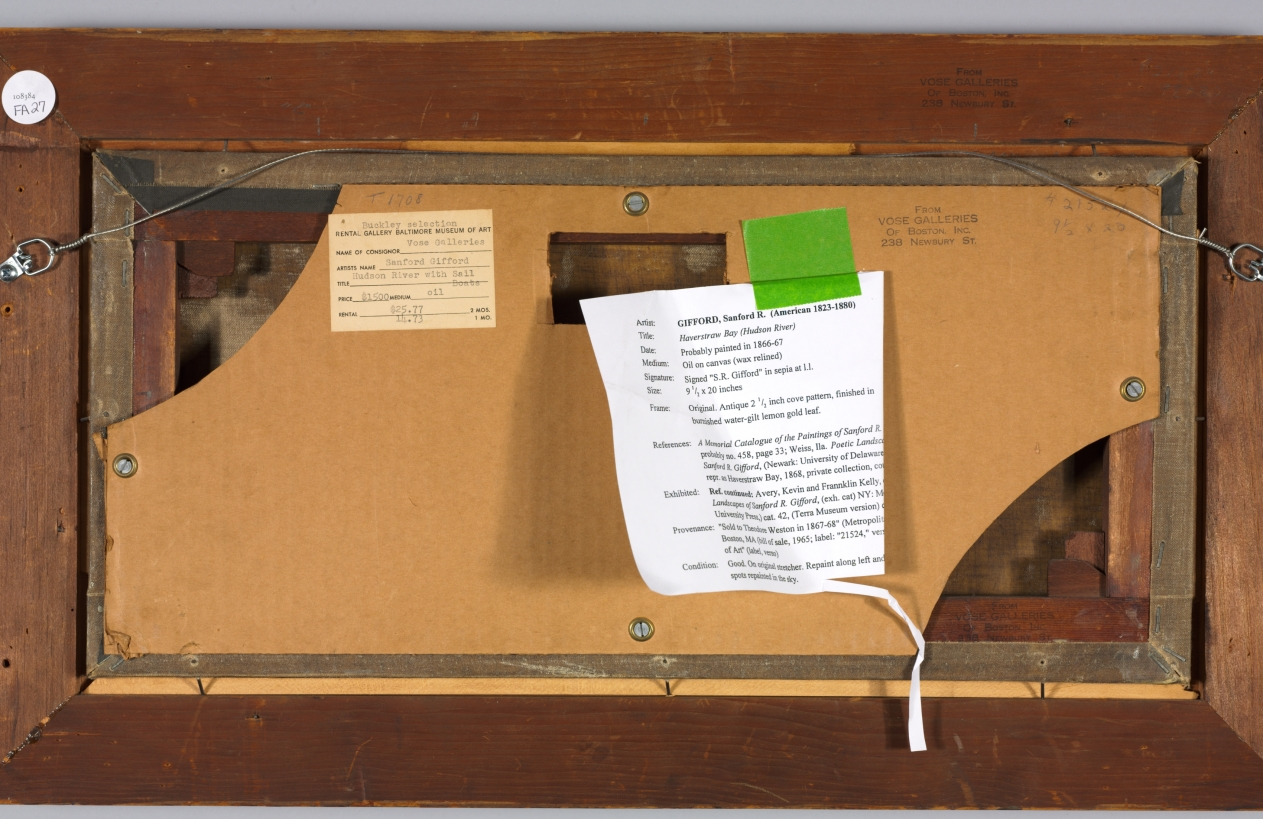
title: Haverstraw Bay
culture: America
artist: Sanford Robinson Gifford (American, 1823–1880)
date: 1868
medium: oil on canvas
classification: Painting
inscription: Signed lower left: S.R. Gifford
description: Located about 40 miles north of New York City, Haverstraw Bay is the widest point on the Hudson River. During the 1860s, it was a prime area for shad fishing, and Gifford’s painting records this activity taking place amid a delicately luminous morning haze.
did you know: Commercial and recreational fishing for now endangered American shad is currently prohibited on the Hudson River.